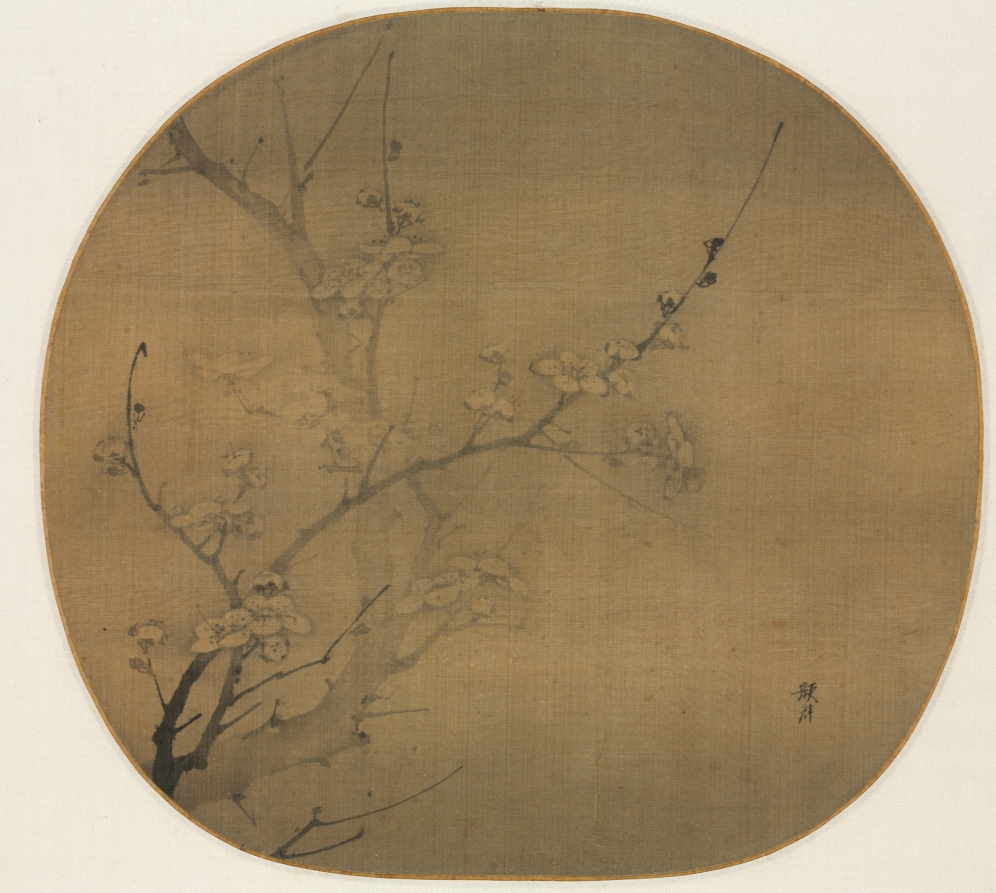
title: Plum Blossoms in Moonlight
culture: China, Yuan dynasty (1271-1368)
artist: Yan Hui (Chinese, active 1270–1310)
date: first half of the 1300s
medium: album leaf, ink on silk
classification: Painting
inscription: 顏輝